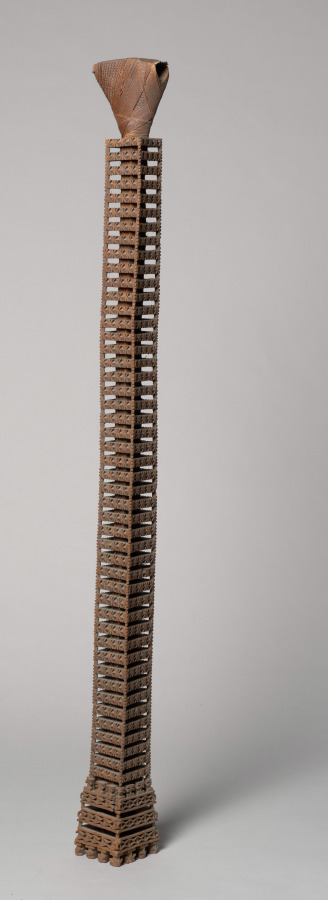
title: Haft from a Ceremonial Adze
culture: Polynesia, Mangaia, Cook Islands, 19th century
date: 1800s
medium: wood, fiber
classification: Sculpture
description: Before European contact, Polynesian carving tools were fashioned from bone, shell, stone, or teeth. The introduction of iron tools facilitated carving, while the demand of European sailors and missionaries for souvenirs provided a new market for craft products. Ceremonial adzes probably represented gods or spirits. The wooden handle of this example is carved with the characteristic K motif. The stone adze blade is lashed to the handle with finely plaited sennit fiber cord. According to legend, the distinctive pattern formed by the sennit lashing was taught to Mangaian craftsman by the gods.